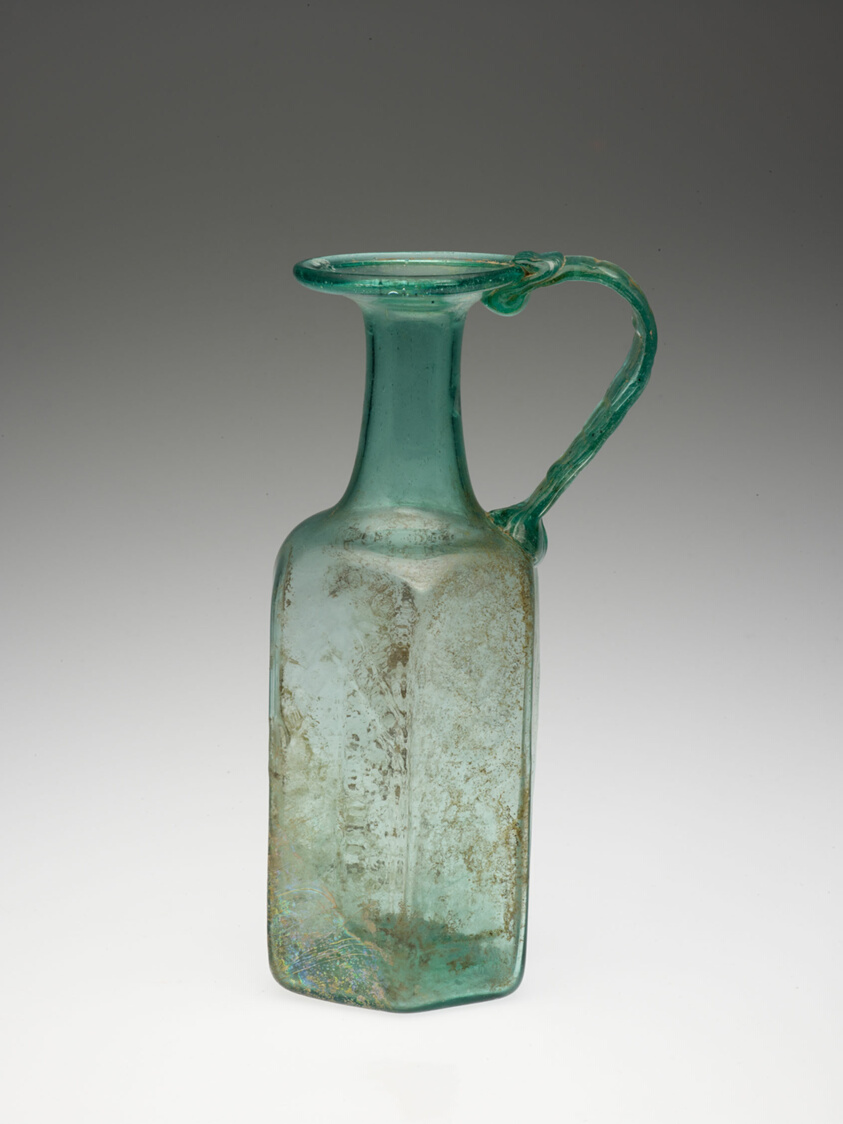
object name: Vessel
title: Ritual Flask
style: syrian, early christian, european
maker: Byzantine; Eastern Mediterranean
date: 6th–7th century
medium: Glass, mold-blown techinique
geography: Syria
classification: vessel; glass; ancient art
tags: vessels, ritual